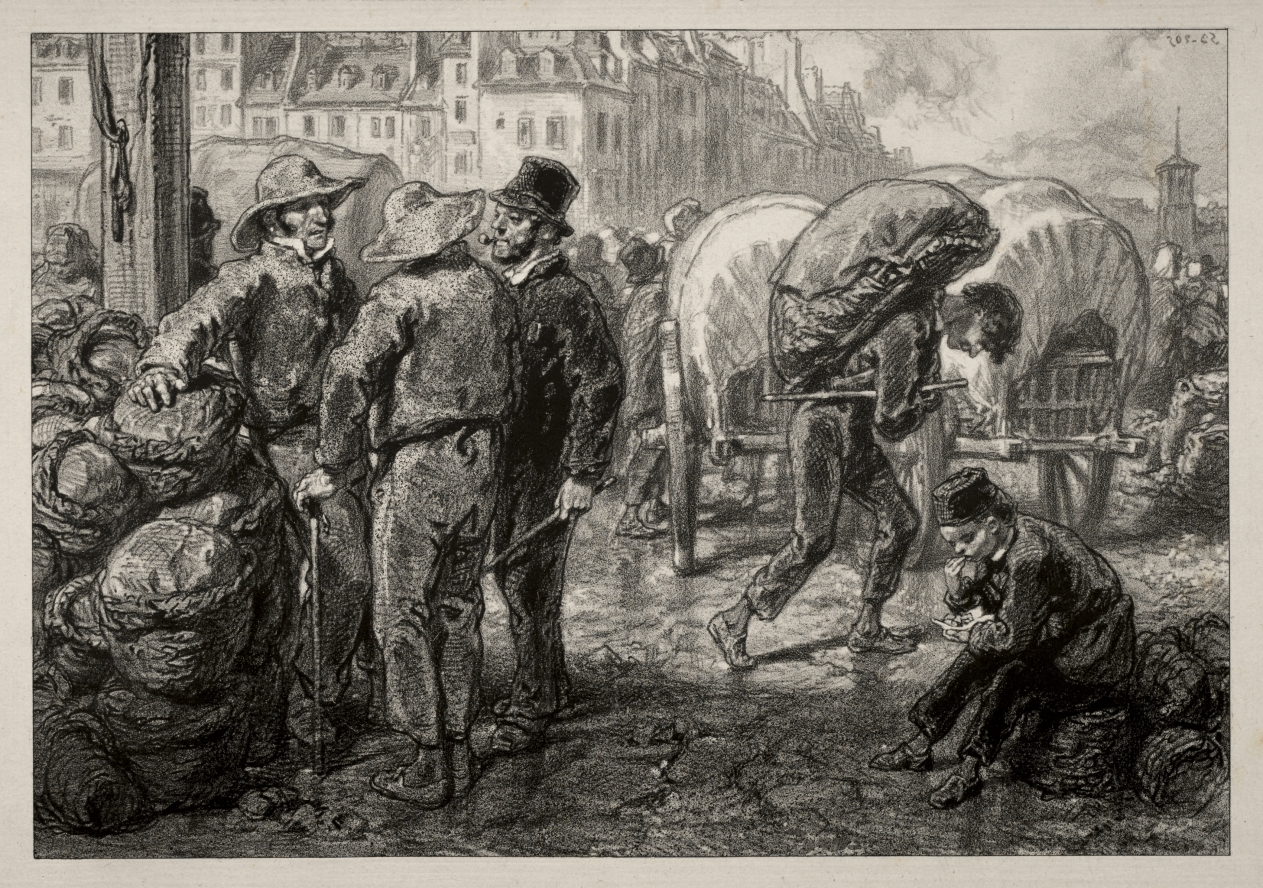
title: Burden Bearers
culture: France, 19th century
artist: Paul Gavarni (French, 1804–1866)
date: c. mid-1800s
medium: lithograph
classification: Print